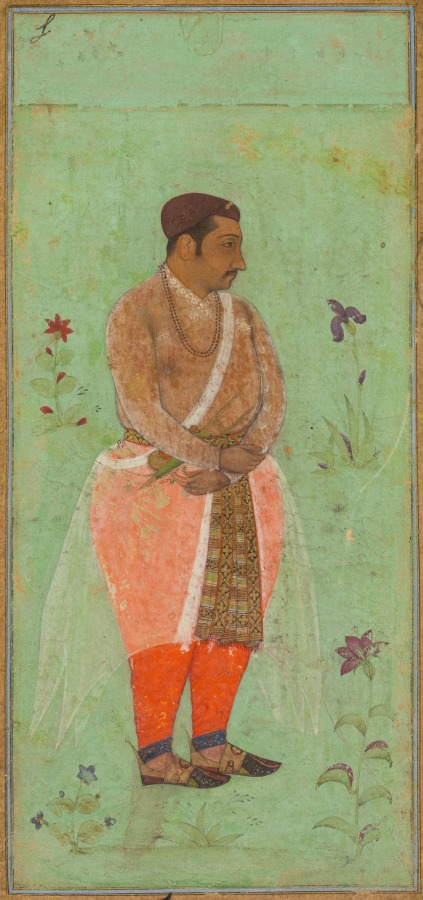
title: Portrait of Suraj Singh Rathor, Raja of Marwar and Maternal Uncle of Shah Jahan: A Page from the Prince Khurram Album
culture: India, Mughal court, early 17th century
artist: attributed to Bishandas (Indian, active c. 1610–30)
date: c. 1600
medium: Gum tempera and gold on paper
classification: Painting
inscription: inscribed in hand of Shah Jahan in lower inner border: shabihi Raja Suraj-Singh Rathor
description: This true-to-life portrait depicts the maternal uncle of the Mughal prince Khurram (1592-1658), who would later become the emperor Shah Jahan. His clothing and accessories-especially the six-pointed wrapped tunic made of prized translucent muslin-reveal his wealth and status. The artist’s skillful brushwork conveys the varied textures of the fabrics and sensitively renders his patient, somewhat weary expression. Prince Khurram selected this painting for inclusion in an album he assembled in 1612. Suraj Singh was a Hindu prince from Marwar, a Rajput kingdom under the auspices of the Mughal empire. His sister, a Marwar princess, was the third wife of the Mughal emperor Jahangir. Intermarriage with Hindu families is one example of the ecumenism of the early Mughal emperors, who adhered to a liberal form of Islam. Suraj Singh died of natural causes while on a military campaign with Prince Khurram in the Deccan in 1619.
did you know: Emperor Shah Jahan himself wrote the label inscription under the painting.